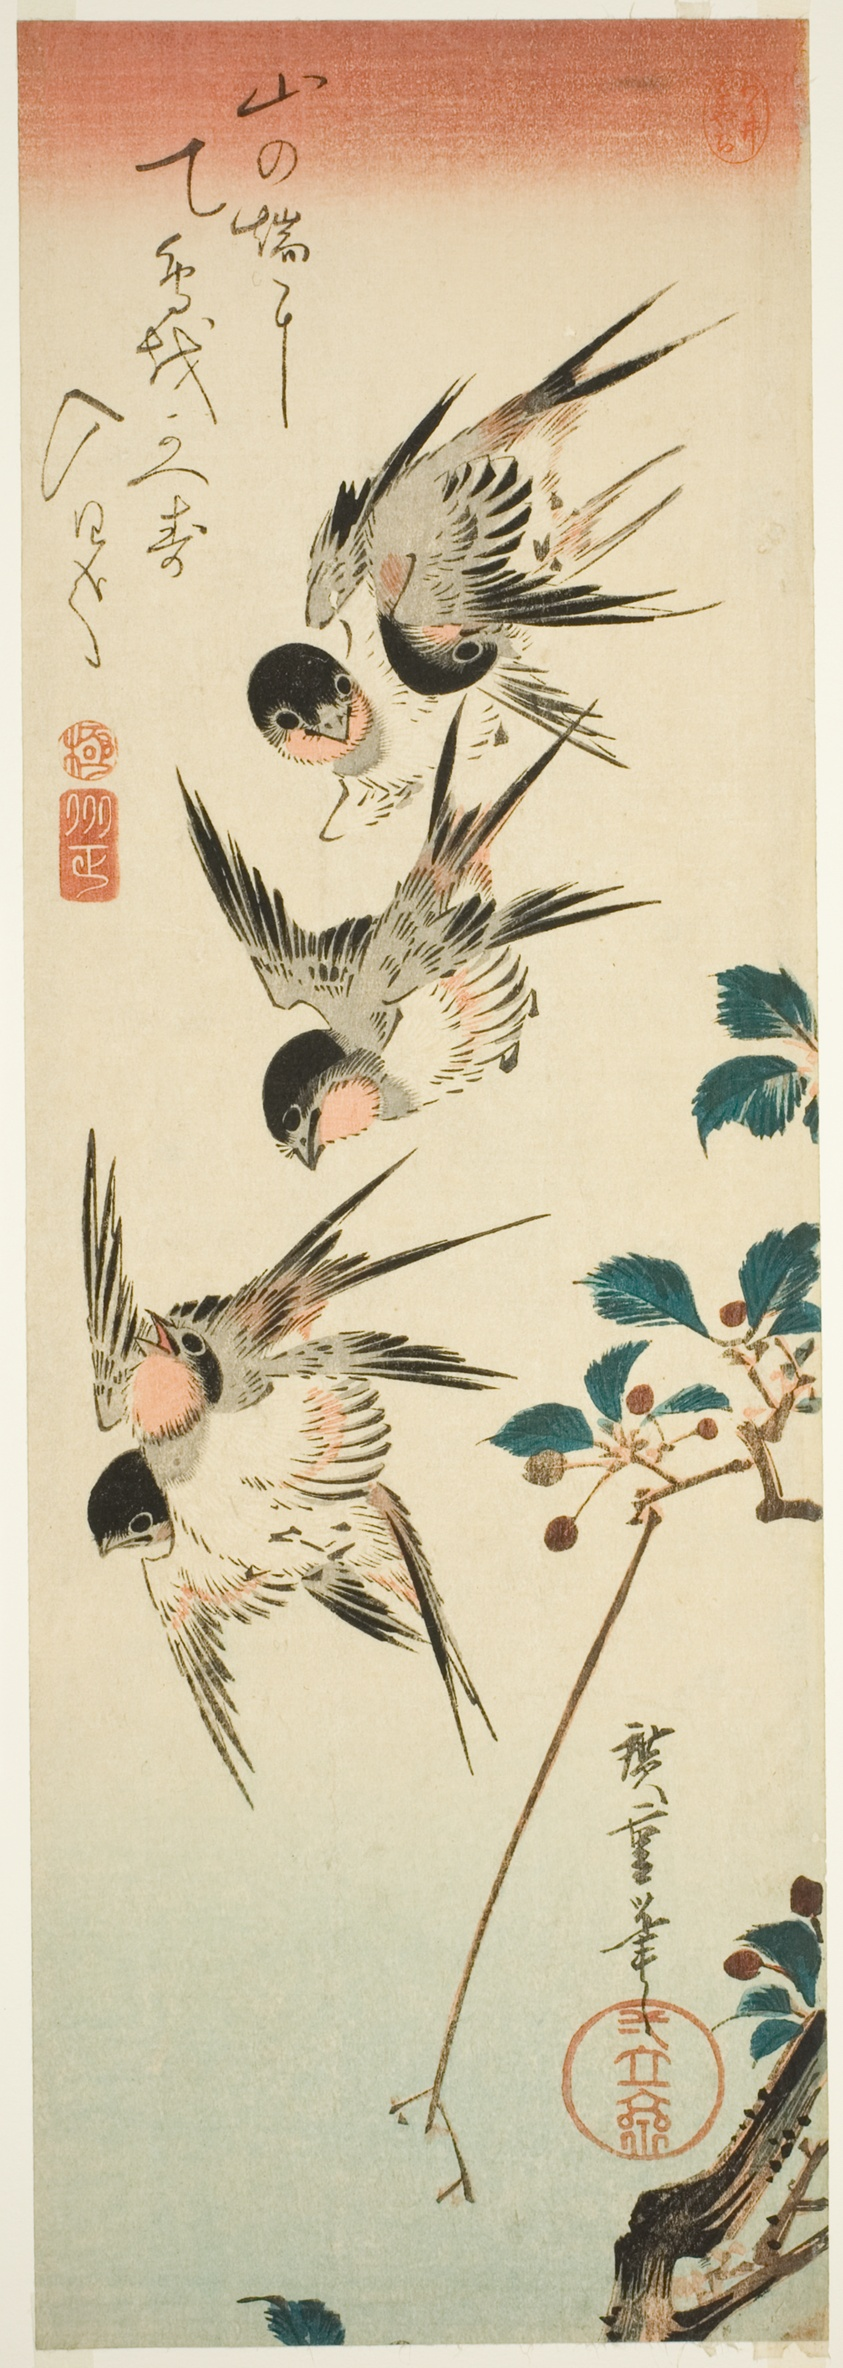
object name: Print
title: Swallows and Cherry Blossoms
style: Japanese (culture or style)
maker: Utagawa Hiroshige 歌川 広重; Japanese, 1797-1858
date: early 1830s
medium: Color woodblock print, chu-tanzaku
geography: Japan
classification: woodblock print; print; asian art